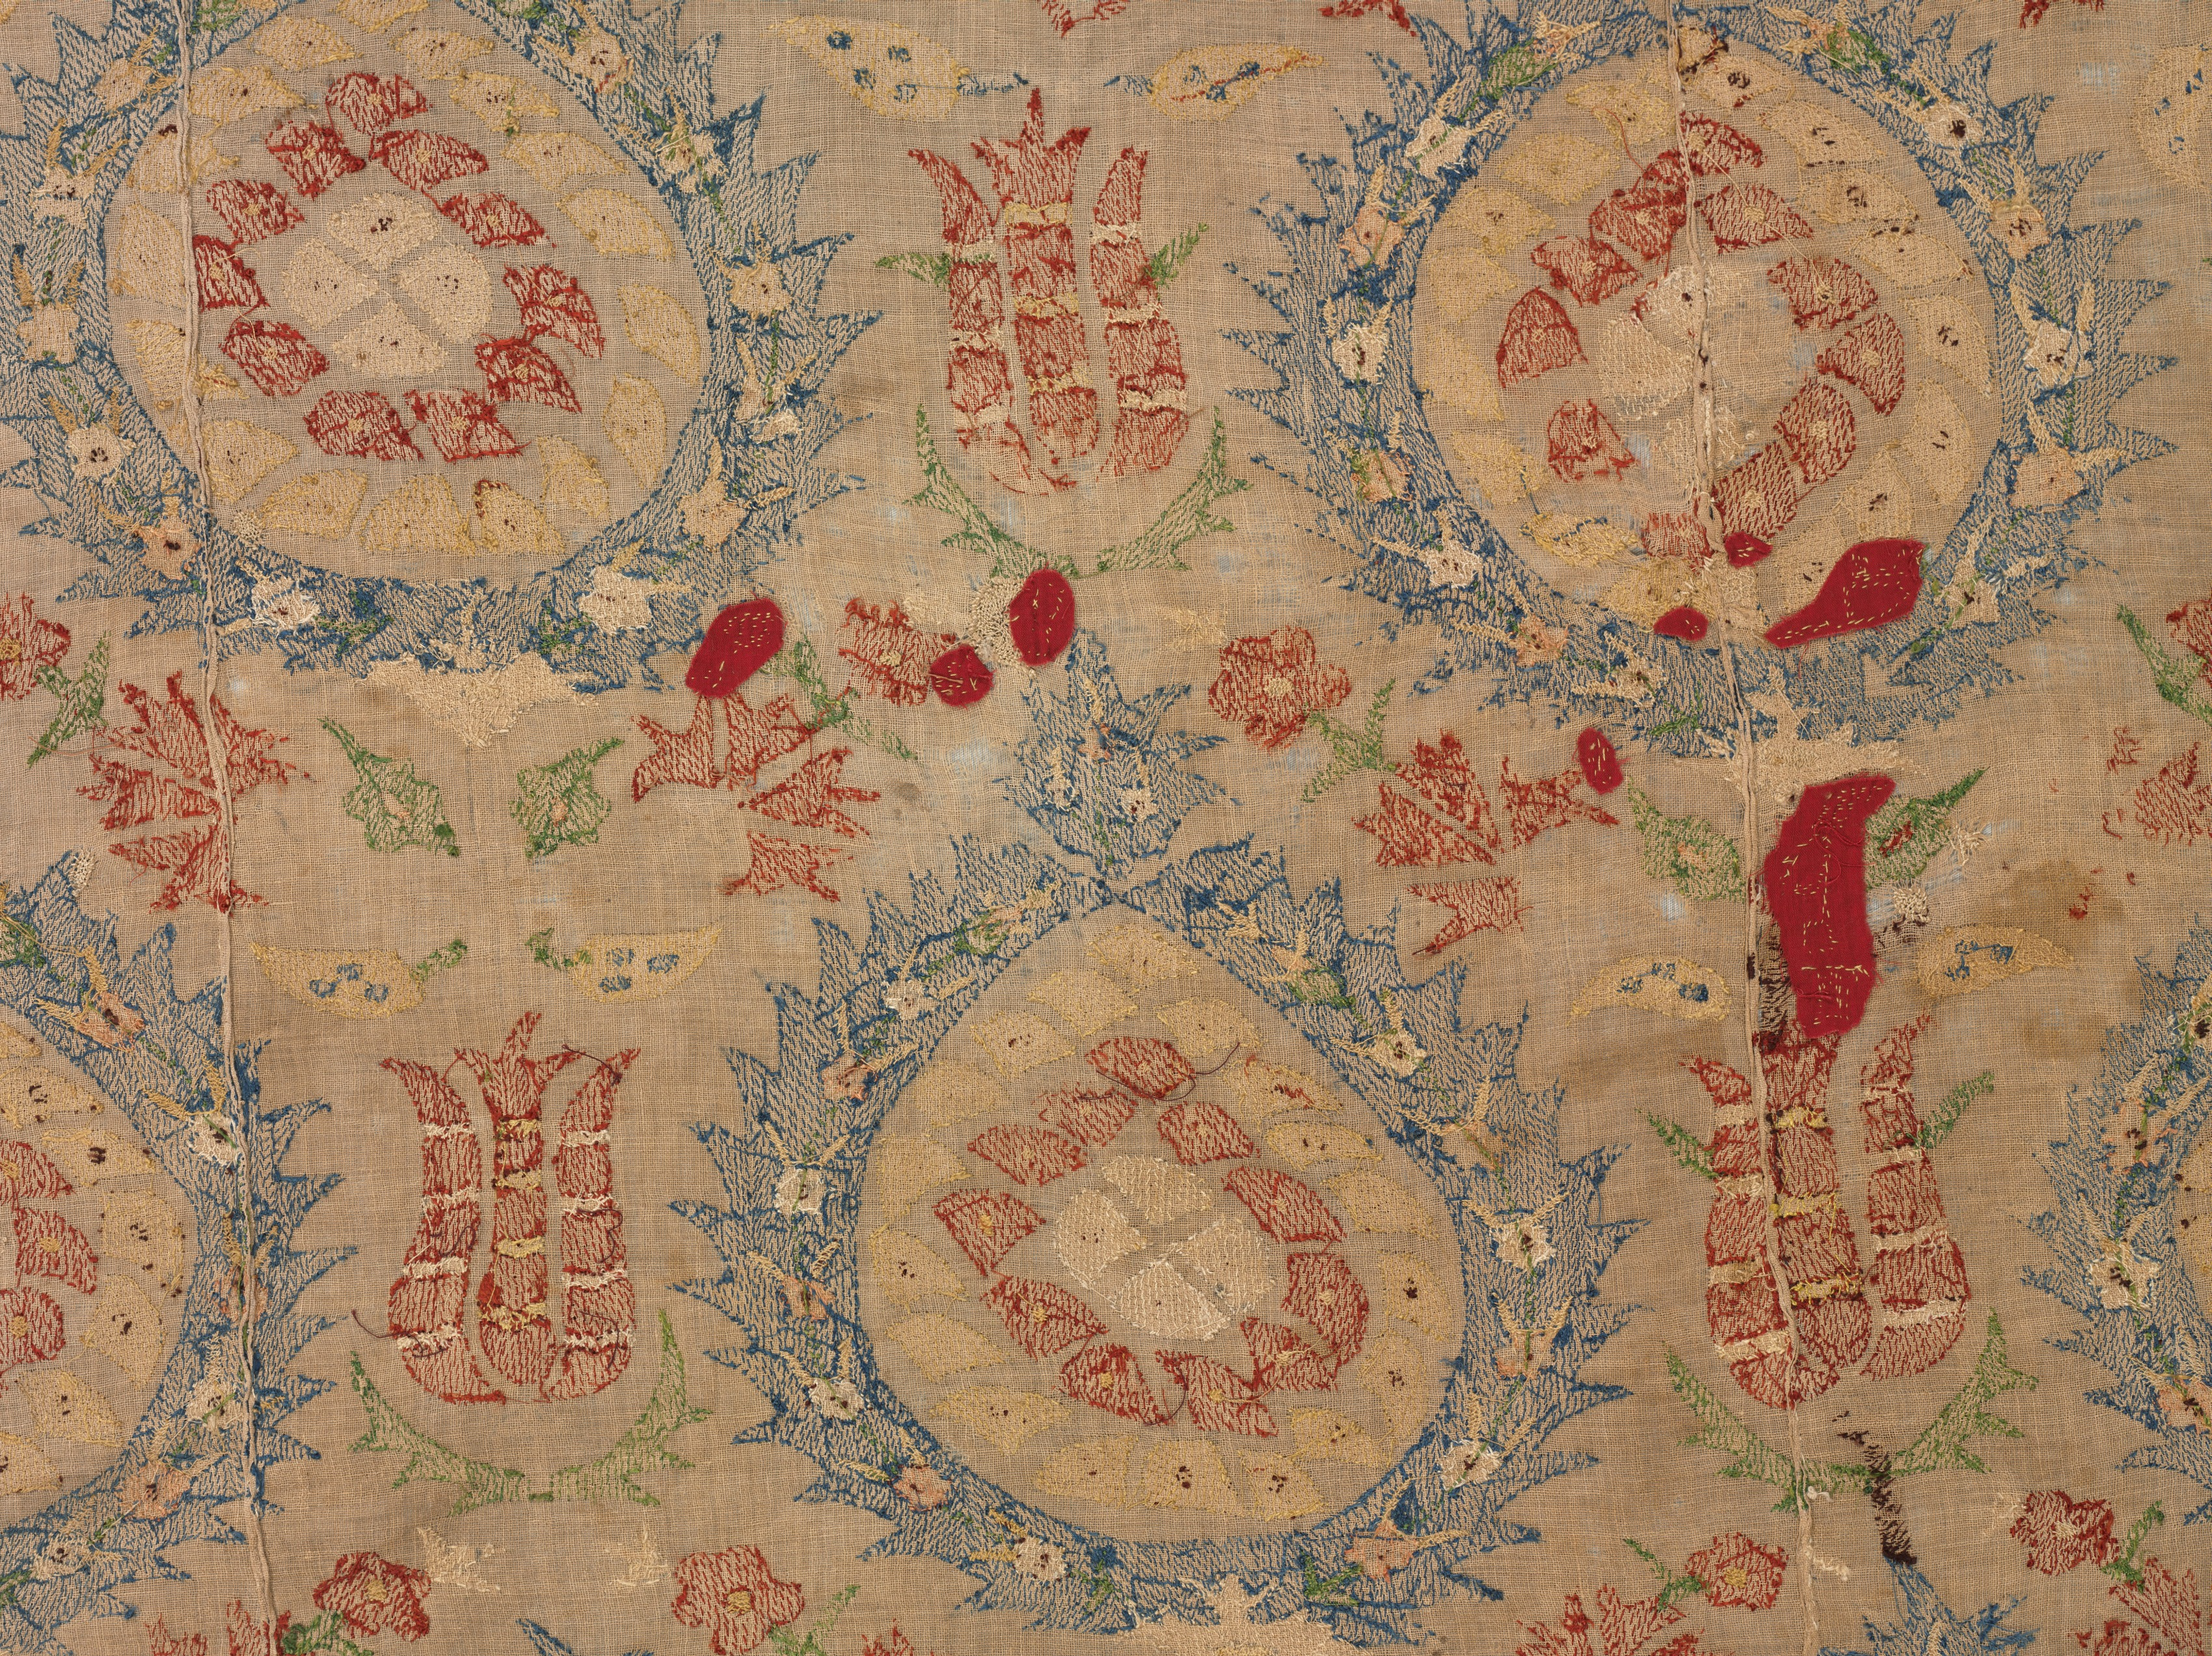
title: Embroidered quilt with pomegranates and tulips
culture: Turkey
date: 1600s-1700s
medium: plain weave: linen; embroidery, running stitch: silk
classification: Embroidery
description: In Turkey, embroidered motifs were often adapted from Ottoman court art, especially luxury silks. Even the same six colors of silk thread were used: crimson or red, blue, green, and brown/black, plus yellow and white that replaced costly gilt- and silver-metal thread. In a typically bold style, pomegranates are framed by serrated leaves. Most of the original dark brown silk thread of the floral stems has disintegrated, revealing black ink outlines on the linen ground.